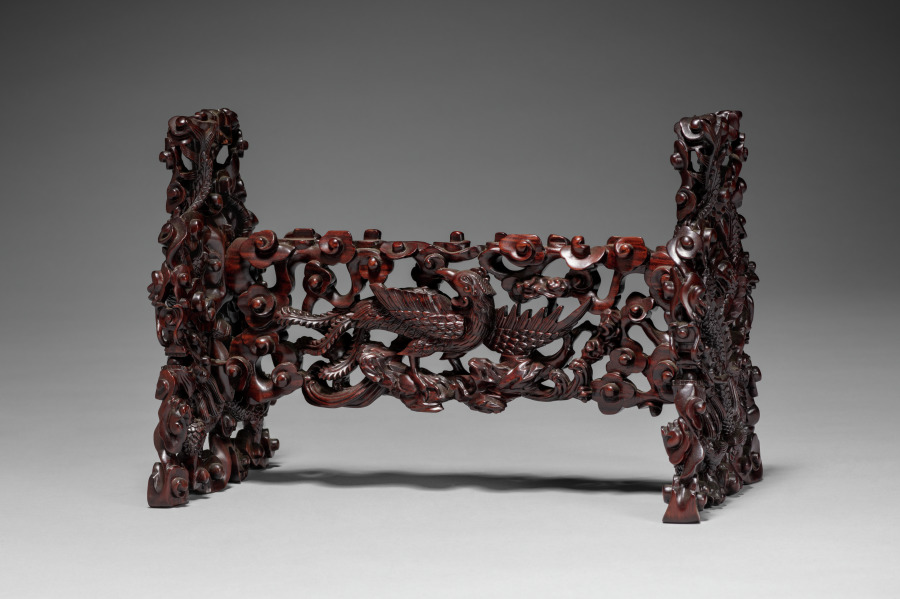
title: Table Screen with Stand (stand)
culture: China, Qing dynasty (1644-1911)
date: 1644–1911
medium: carved wood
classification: Wood